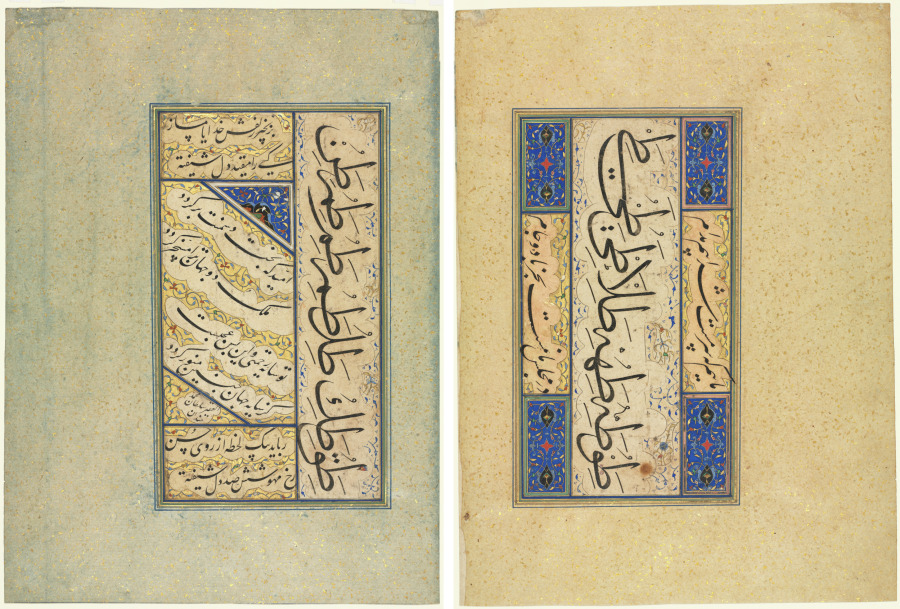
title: Persian Quatrains (Rubayi) and Calligraphic Exercises (recto); Persian Verse (khamriyya) (verso)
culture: Afghanistan, Herat, Safavid period (1501–1722)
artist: Sultan Muhammad Khandan (Iranian, d. after 1550)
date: c. 1509–50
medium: ink, gold, and opaque watercolor on paper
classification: Manuscript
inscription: [Persian quatrain]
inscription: [Persian quatrain]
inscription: Al-faqīr Sulṭān Muḥammad Khandān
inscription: [Persian khamriyya]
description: This page contains two quatrains—poems made up of four lines. The diagonally written text in the center of the page is a poem addressed to a ruler, expressing hope for his success and the downfall of his enemies. The second poem is split between the horizontal panels at the top and bottom of the page. This quatrain praises the beauty of the writer’s beloved, saying that “her moonlike face can steal away a hundred besotted hearts.” At the right are calligraphic exercises displaying letters of the alphabet and the virtuoso skill of the calligrapher Sultan Muhammad Khandan, who signed the page in the triangle at the lower left of the inner text block.